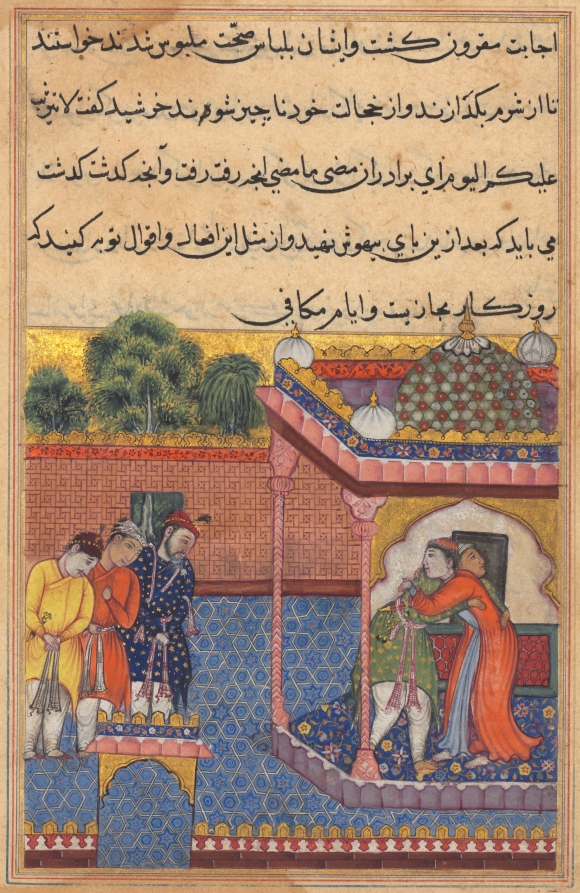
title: Khurshid reunited with her husband Utarid, from a Tuti-nama (Tales of a Parrot): Thirty-second Night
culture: Mughal India, court of Akbar (reigned 1556–1605)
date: c. 1560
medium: gum tempera, ink, and gold on paper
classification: Painting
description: On the right, Khurshid, wearing orange, and Utarid embrace after a long separation. The three men standing on the left with heads hanging in shame have just confessed the misdeeds they committed against Khurshid. Upon admitting these transgressions, they are miraculously cured of the ailments that inflicted them.